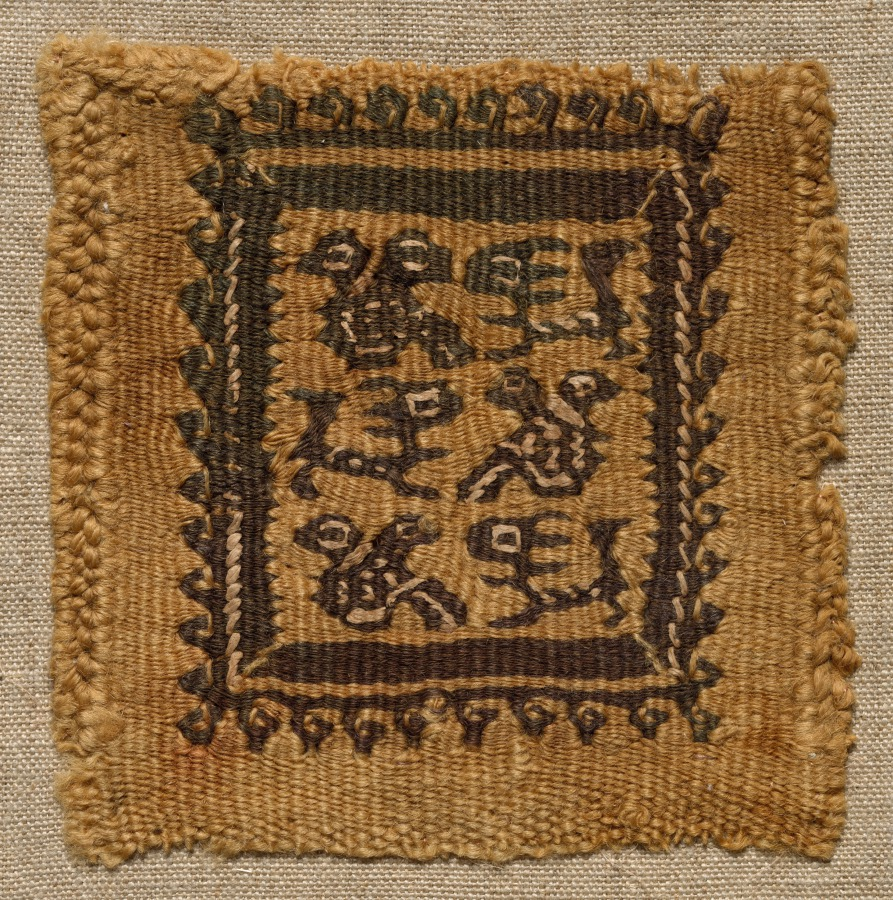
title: Fragment, with a Segmentum, from a Tunic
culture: Egypt, Byzantine period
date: 400s - 600s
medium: tabby weave with interwoven tapestry ornament, linen and wool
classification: Textile